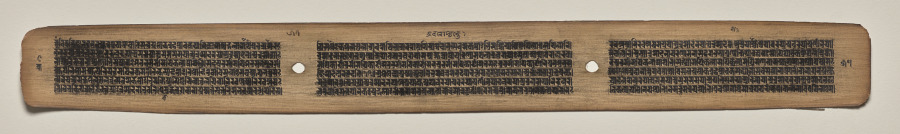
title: Text, Folio 57 (verso), from a Manuscript of the Perfection of Wisdom in Eight Thousand Lines (Ashtasahasrika Prajnaparamita-sutra)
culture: Eastern India, Bihar, Vikramashila Monastery. Painting: Nepal, Kathmandu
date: Sunday, September 14, 1119 (year 239 of the Newar Samvat in the month of Ashvina)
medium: gum tempera and ink on palm leaves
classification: Painting